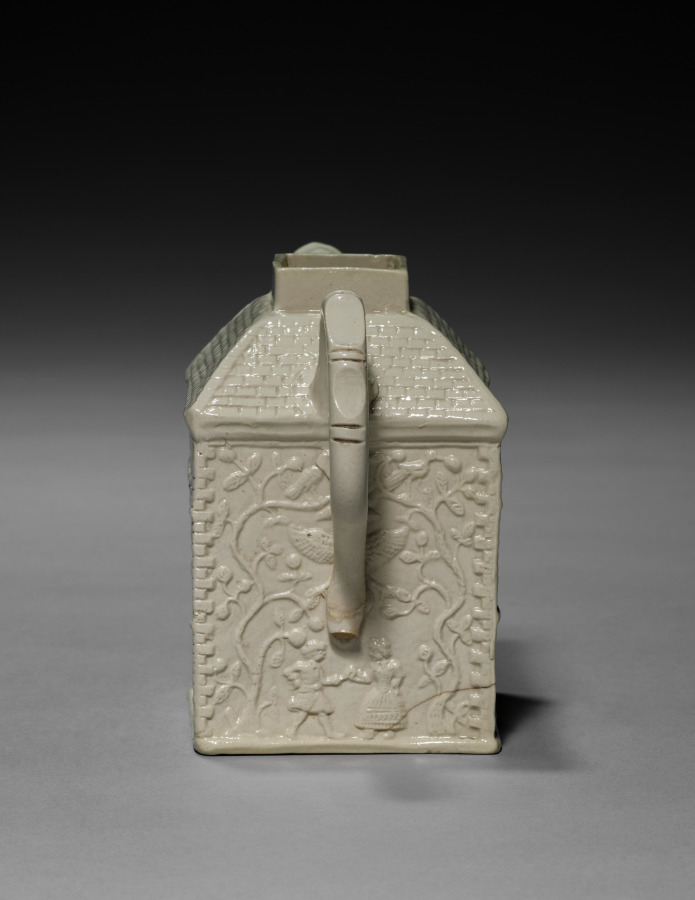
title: Teapot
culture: England, Staffordshire, 18th century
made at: Staffordshire Factory (British)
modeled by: Aaron Wood (British)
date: 1740–1750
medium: salt-glazed earthenware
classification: Ceramic